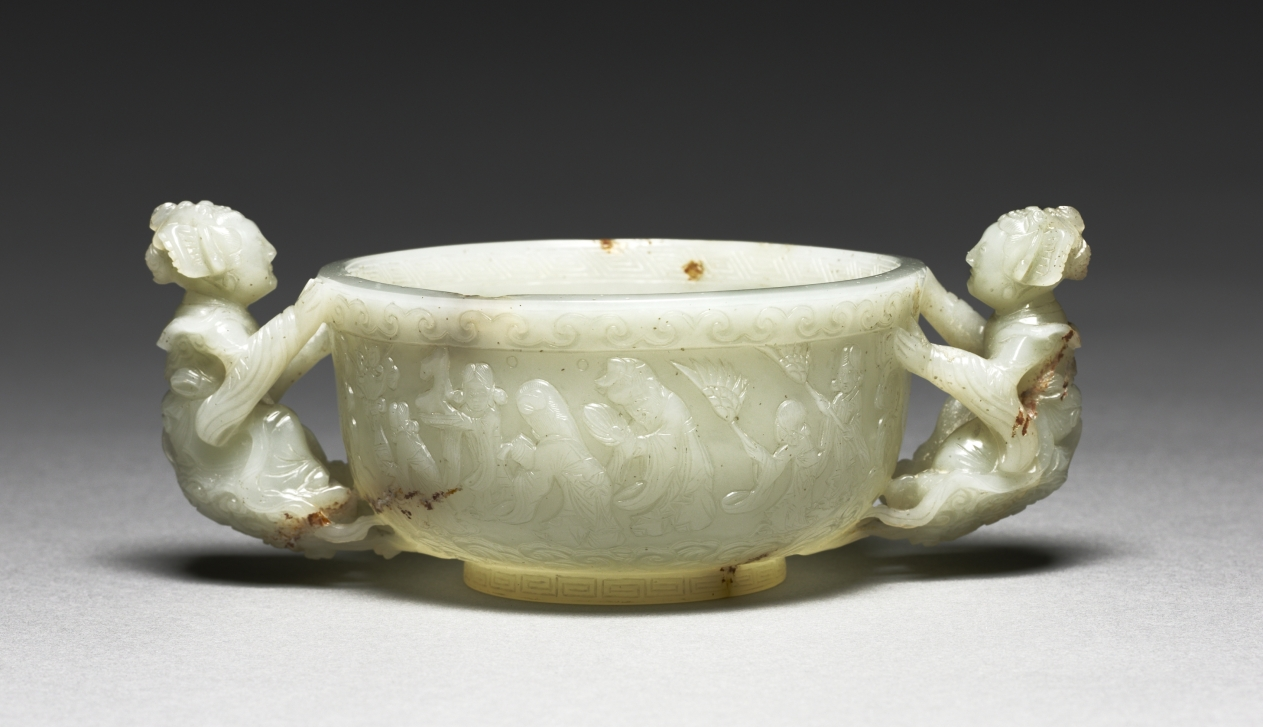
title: Cup with Daoist Figures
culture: China, Qing dynasty (1644–1911), Qianlong period (1736–95)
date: 1736–95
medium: Pale greenish-white jade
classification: Jade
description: During the Qing dynasty, Suzhou’s best products were sent north to the capital. Those that met imperial approval were sometimes graced with Qianlong’s mark, added by calligraphers and jade workers at court. The lack of a Qianlong mark on the Cleveland cup suggests that it might not have reached the court. Previously dated to the Yuan dynasty (1271–1368), new scholarship dates this cup to the Qing period.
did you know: Two female immortals serve as handles, while a Daoist procession with immortals, musicians, and attendants winds around the body of the cup.